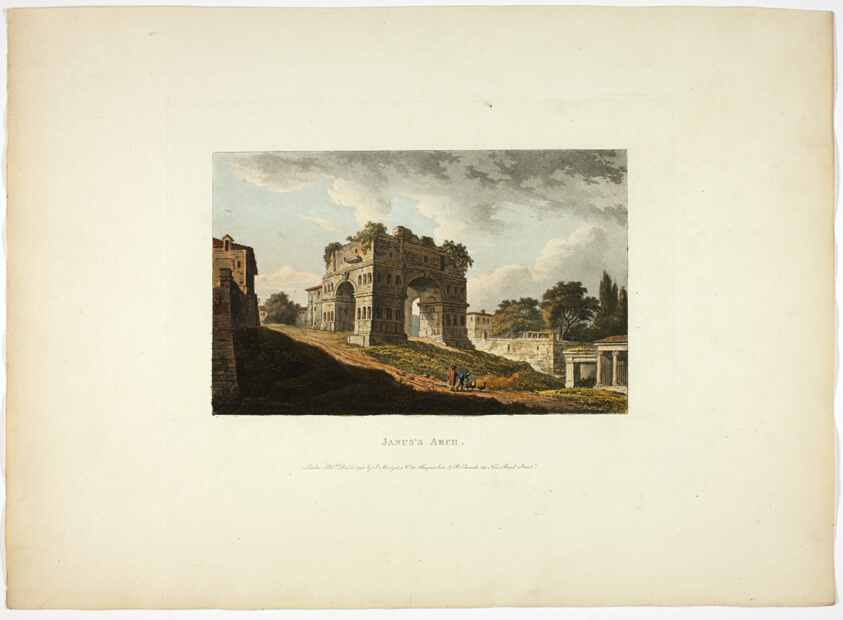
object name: Print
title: Janus's Arch, plate twenty from the Ruins of Rome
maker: M. Dubourg, (English, active 1786-1838); published by J. Merigot (Italian, Unknown)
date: published December 6, 1796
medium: Hand-colored aquatint on paper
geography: England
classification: aquatint; print; prints and drawing